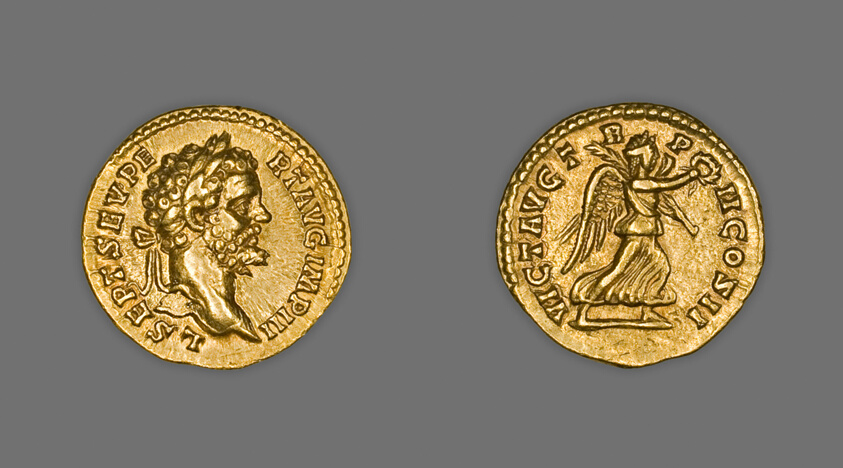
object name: Coin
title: Aureus (Coin) Portraying Emperor Septimus Severus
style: imperial (roman), ancient, roman (ancient, style or period)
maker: Roman; minted in Rome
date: 194-195, issued by Septimius Severus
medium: Gold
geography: Rome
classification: coin; ancient art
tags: portraits